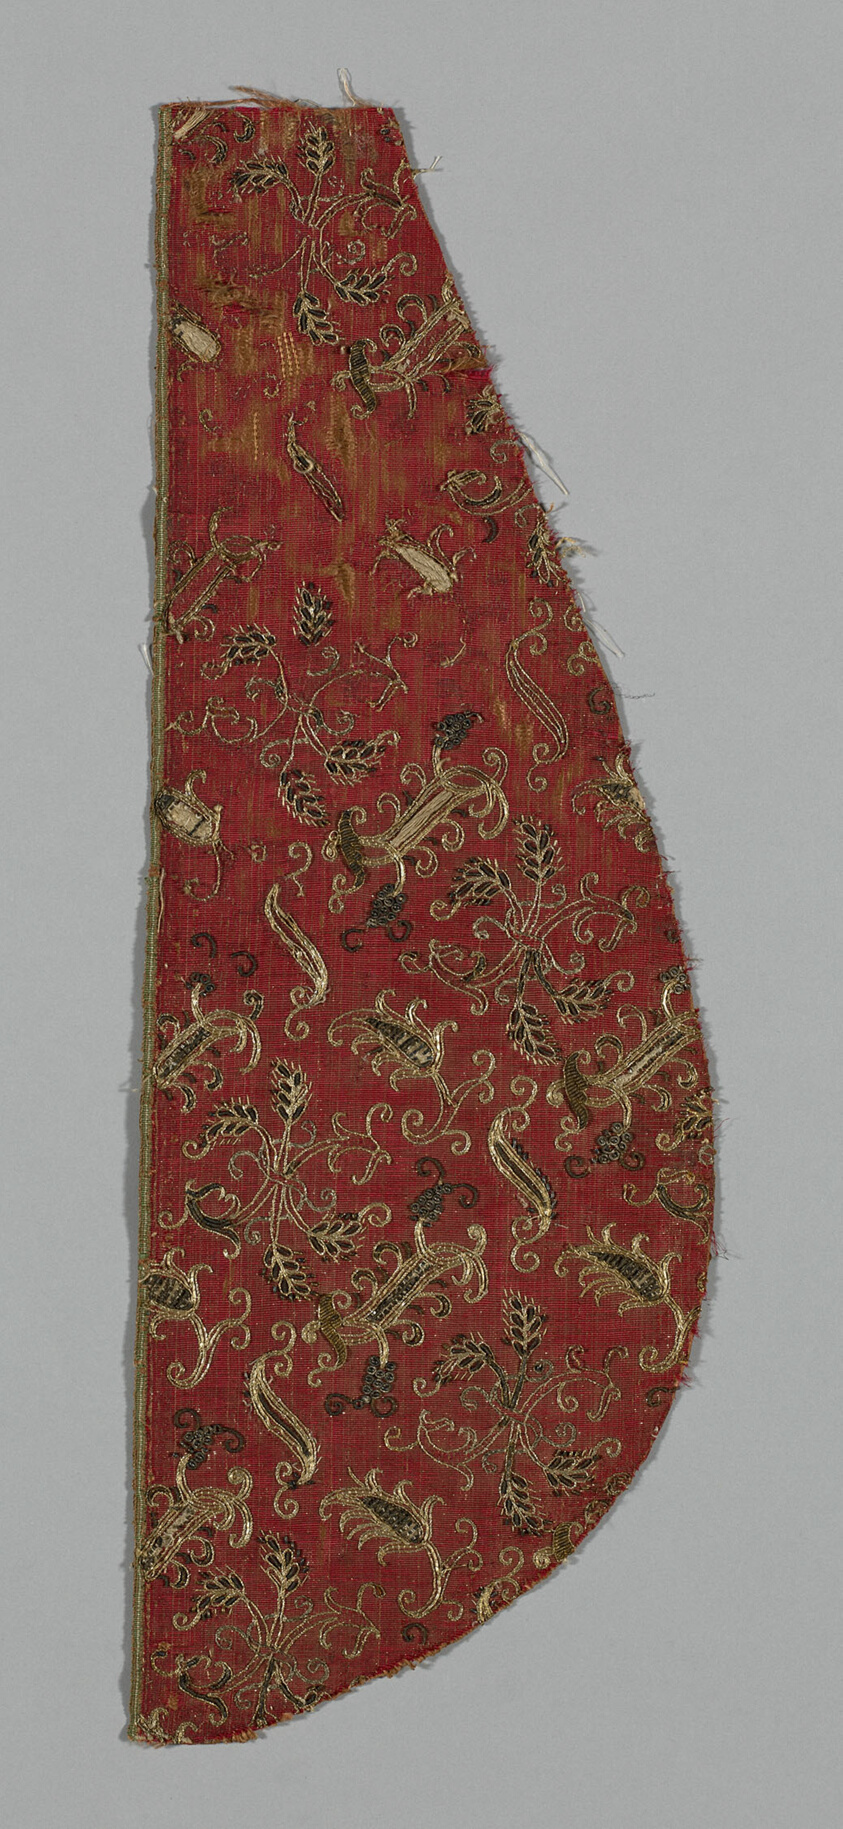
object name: Textile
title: Fragment (probably from a Chasuble)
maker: Italy or Spain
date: 17th century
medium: Silk; flat and raised couching (old card)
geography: Italy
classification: textile; needlework (visual works)